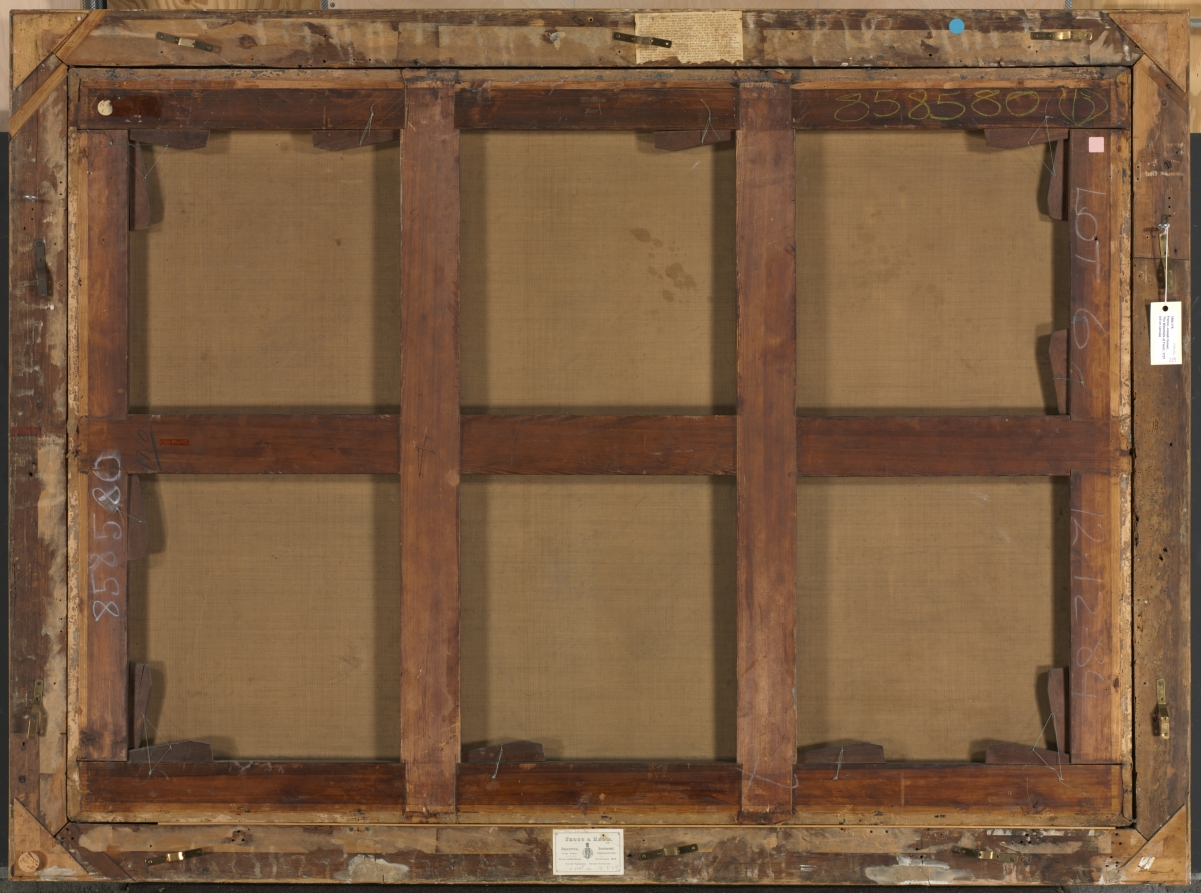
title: The Waterfalls at Tivoli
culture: France, 18th century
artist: Claude-Joseph Vernet (French, 1714–1789)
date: 1737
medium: oil on canvas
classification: Painting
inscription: Signed lower left: "fait a Rome par J. Vernet"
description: Likely Vernet's first major work during his study in Rome, this landscape demonstrates his signature style. Vernet preferred and is remembered for marine subjects and water is also a central theme in this painting. Vernet became the predominant French landscape painter of the 18th century, contributing to a long French tradition. While in Rome, he absorbed the Italian tradition of dramatic, rugged landscape paintings, established by Salvador Rosa in the 1600s. This influence is reflected in Vernet's presentation of the craggy rock formations and cascades that made Tivoli, a small town twenty miles east of Rome, famous. Vernet here synthesizes this style with the calmer pastoral mode, more typical of the French landscape tradition, with its roots in the work of Claude Lorrain. Vernet generally inserted elements of humanity in his work, here evident in the touches of civilization in the background and the fishermen in the foreground. Vernet enjoyed considerable popularity, evidenced by the fact that Napoleon's brother Lucien Bonaparte held this painting as a part of his impressive collection.